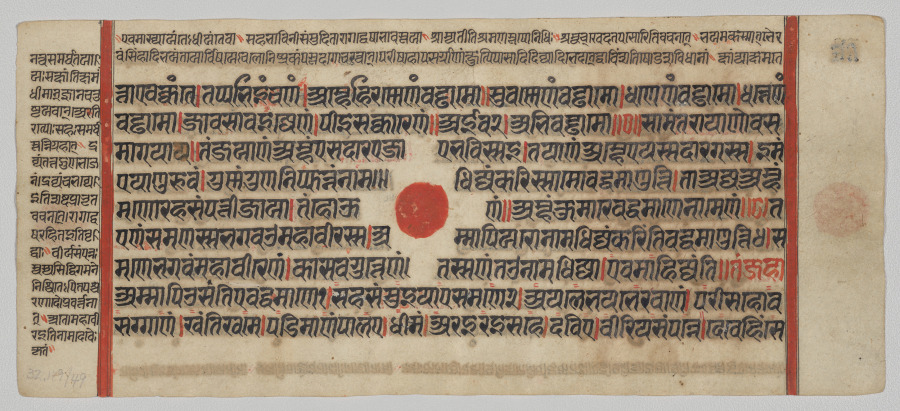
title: Text, Folio 34 (recto), from a Kalpa-sutra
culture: Western India, Gujarat, last quarter of the 15th century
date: c. 1475–1500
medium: Gum tempera, ink, and gold on paper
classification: Painting